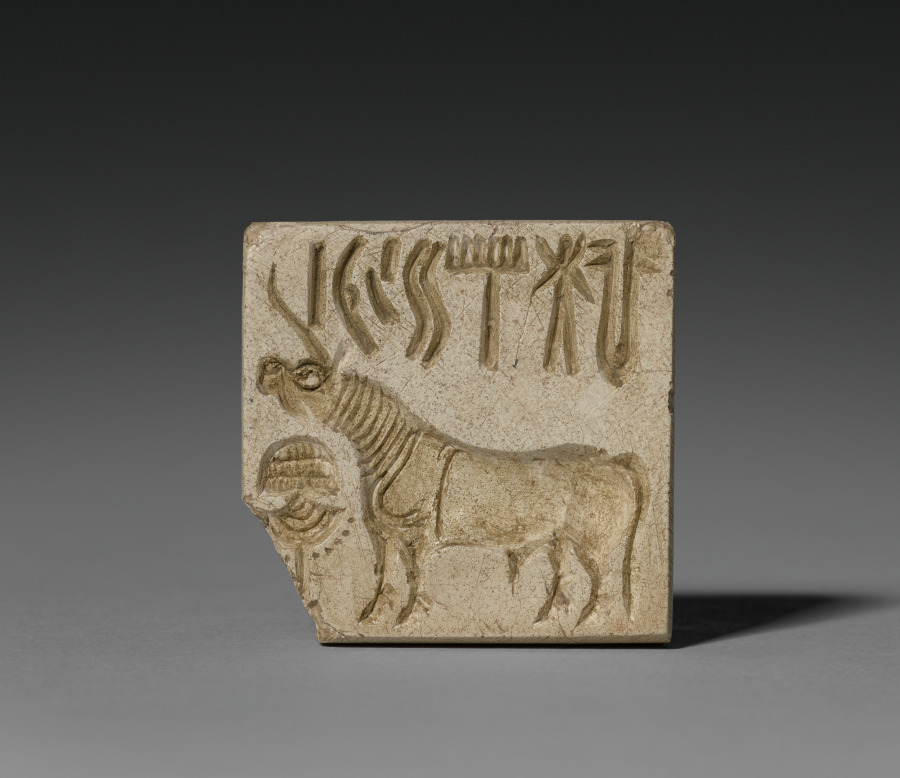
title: Seal with Unicorn and Inscription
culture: Pakistan, Indus Valley civilization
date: c. 2000 BCE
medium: steatite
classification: Seals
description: Indus Valley seals appear to have been hung on a string that passed through a boss on the reverse side. This animal, carved with detailed markings around his neck and forequarters, has his head positioned over an object on a stand that may be interpreted as an altar or brazier or censer; it is not known whether it is for offerings to or sacrifice of the animal.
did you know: Specialists disagree as to whether single-horned bovines actually lived during the time of the Indus Valley Civilization, four thousand years ago.